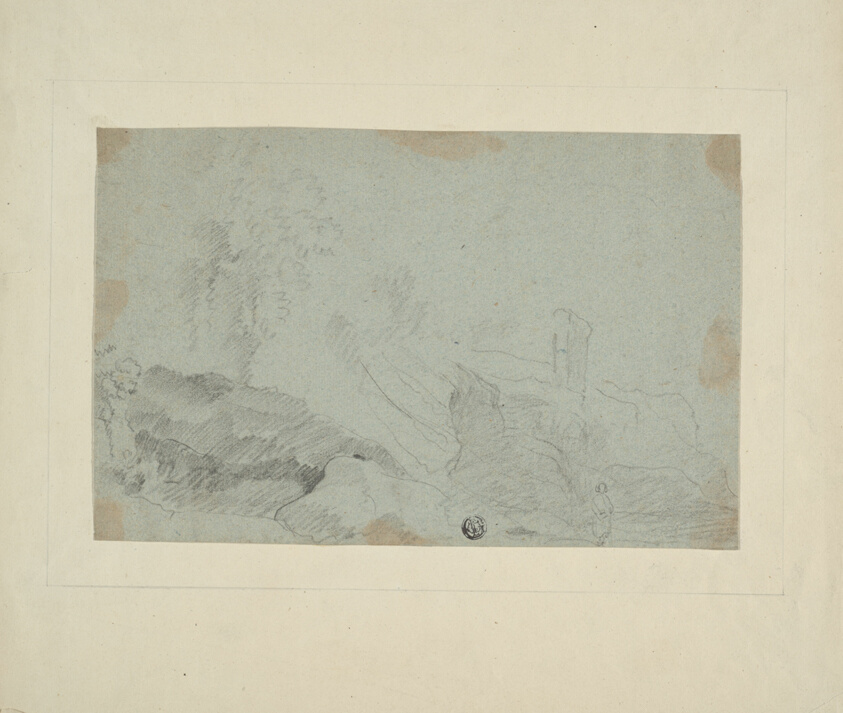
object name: Drawing and Watercolor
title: Rocky Landscape with Standing Figure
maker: Attributed to Richard Wilson; English, 1714-1782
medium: Charcoal on blue laid paper, tipped onto cream wove paper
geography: England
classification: charcoal; drawings (visual works); prints and drawing